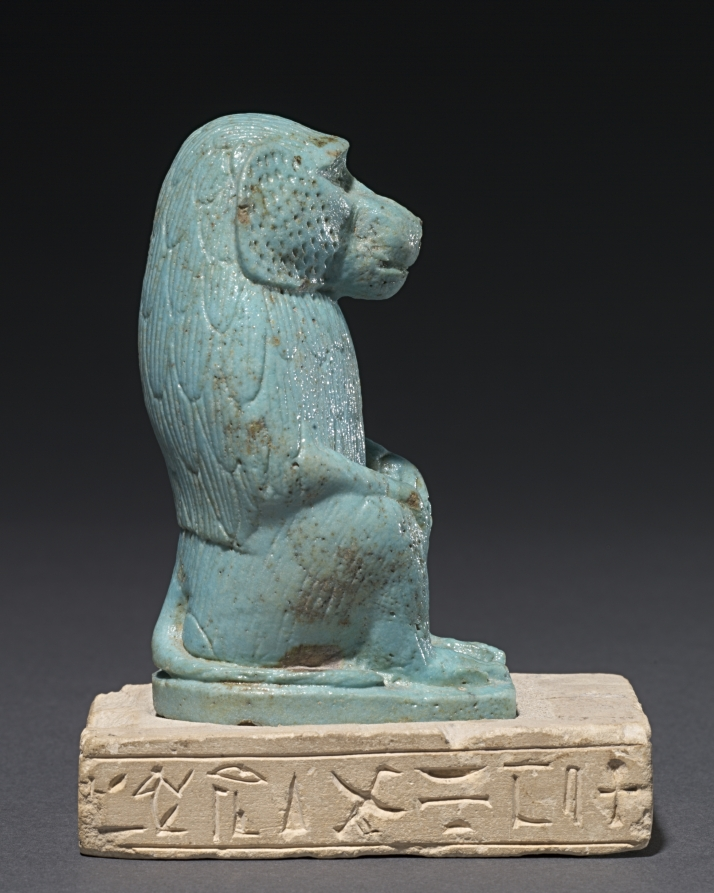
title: Baboon on a Limestone Base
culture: Egypt, Late period (715–332 BCE), Dynasty 30–Greco-Roman period (332 BCE–395 CE), Ptolemaic dynasty (305–30 BCE)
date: 380–30 BCE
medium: pale turquoise faience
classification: Sculpture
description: This finely carved Papio hamadrayas baboon squats low on a base, hands on knees in a traditional pose, copied from nature. Mane and mantle are incised with a scalloped pattern to imitate tufts of fur, and the sides of the face are stippled or dotted. The separate limestone base is ancient; judging by the inscription it does not belong with the statuette, which has been glued onto it in modern times. It reads, "Words spoken by Harpocrates, given life and health, lord of heaven, (on behalf of) Padiuser, the son of Usernakht and [mother's name uncertain]." The baboon is the sacred animal of Thoth, god of the moon and of writing, and guide of the deceased in the underworld. Thoth's cult reached immense popularity in the Late and Ptolemaic periods (the Greeks identified him with Hermes). Statuettes of Thoth as a baboon are common, although not nearly as numerous as presentations of Thoth's other animal manifestation, the sacred Ibis.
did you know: The statuette is made from Egyptian faience and is glazed with a pale, semigloss turquoise.